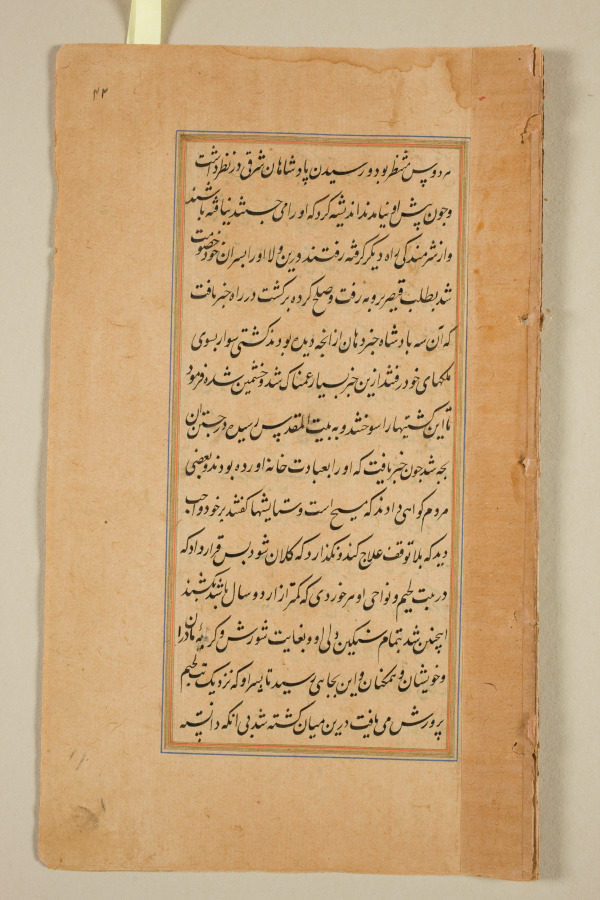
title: Text page from a Mirror of Holiness (Mir’at al-quds) of Father Jerome Xavier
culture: Mughal India, Allahabad, made for Prince Salim (1569–1627)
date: 1602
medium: Ink and gold on paper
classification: Manuscript